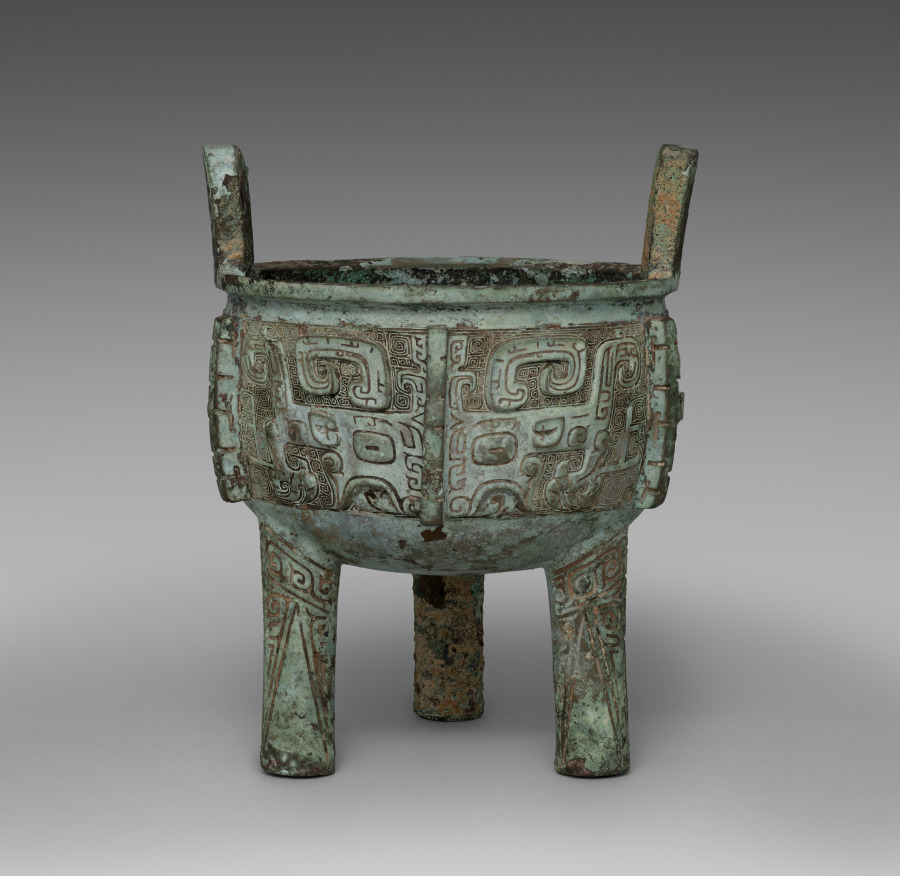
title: Tripod (Ding)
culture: China, Shang dynasty (c. 1600–c. 1046 BCE), Anyang phase (c. 1250–1046 BCE)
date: c. 1250–1046 BCE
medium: bronze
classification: Metalwork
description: Animal images in ritual bronzes served as symbolic messengers of the supernatural realms. Among others, the animal mask called taotie emerged as the most potent symbolic form. The formidable mask emanates a powerful presence with an unforgettable stare. It expresses an overwhelming feeling of mystery, representing a transcendent, supernatural concept in ancient ritual art.